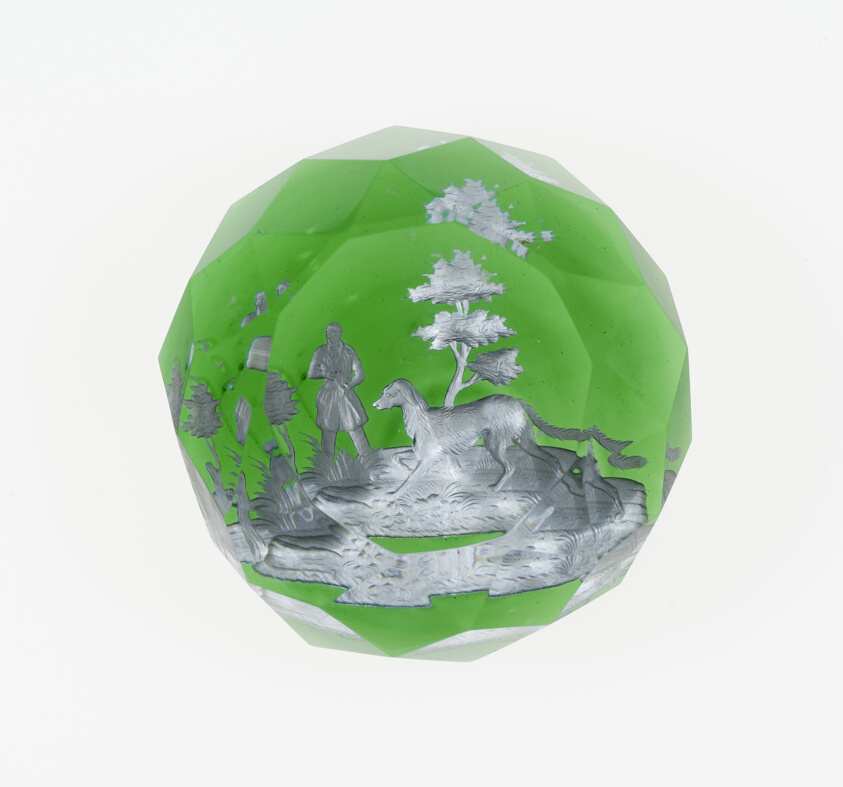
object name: Glass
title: Paperweight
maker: Baccarat Glassworks (Cristalleries de Baccarat); Lorraine, France, founded 1764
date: c. 1846–55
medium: Glass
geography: Lunéville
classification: paperweight; sulphide (glass); european decorative arts; glass